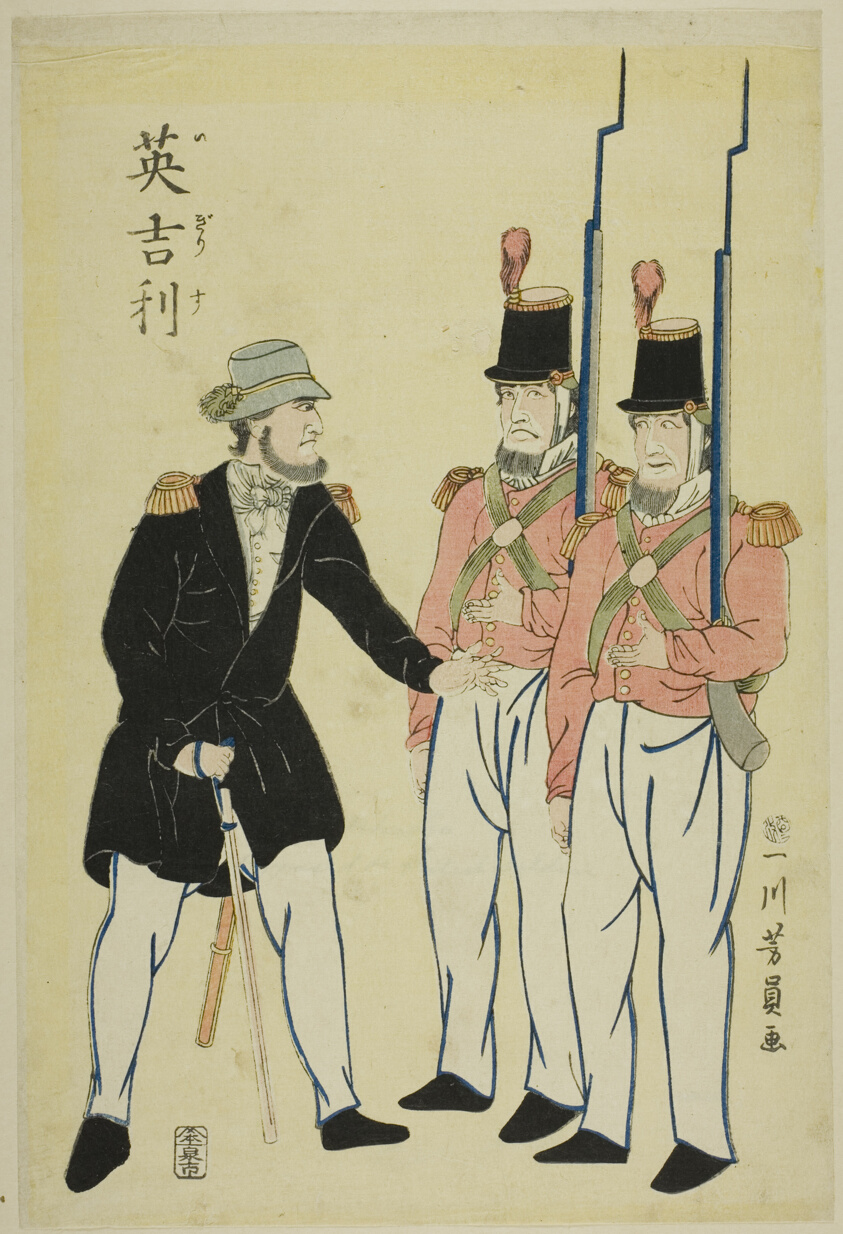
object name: Print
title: English officer and soldiers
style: Japanese (culture or style)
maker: Utagawa Yoshikazu (Japanese, active c. 1850–70)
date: 1861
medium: Color woodblock print; oban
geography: Japan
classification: woodblock print; print; asian art